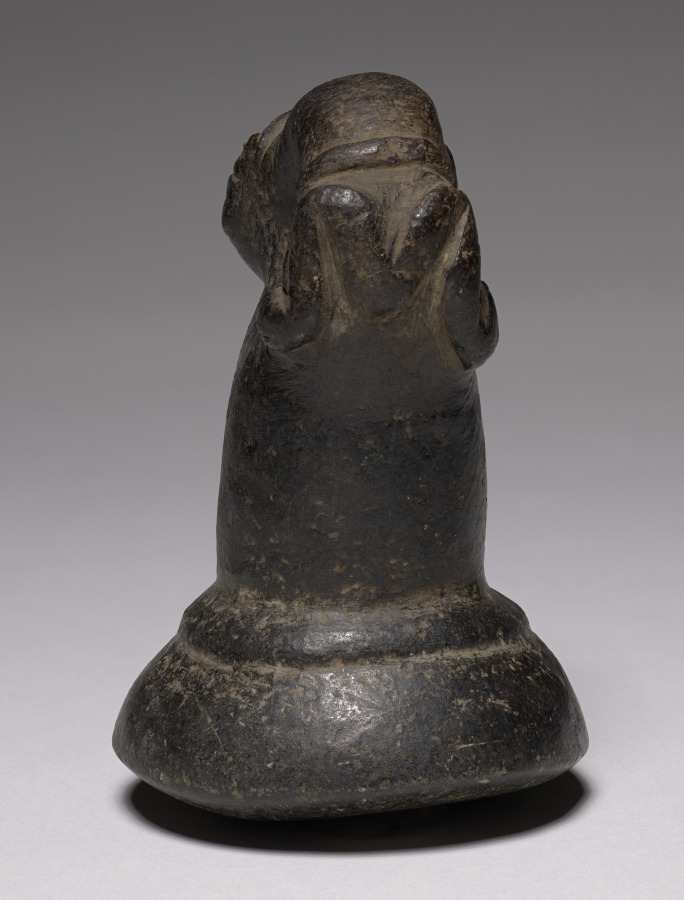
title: Pestle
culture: West Indies, Arawak (?), 15th century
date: 1400s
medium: stone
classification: Sculpture